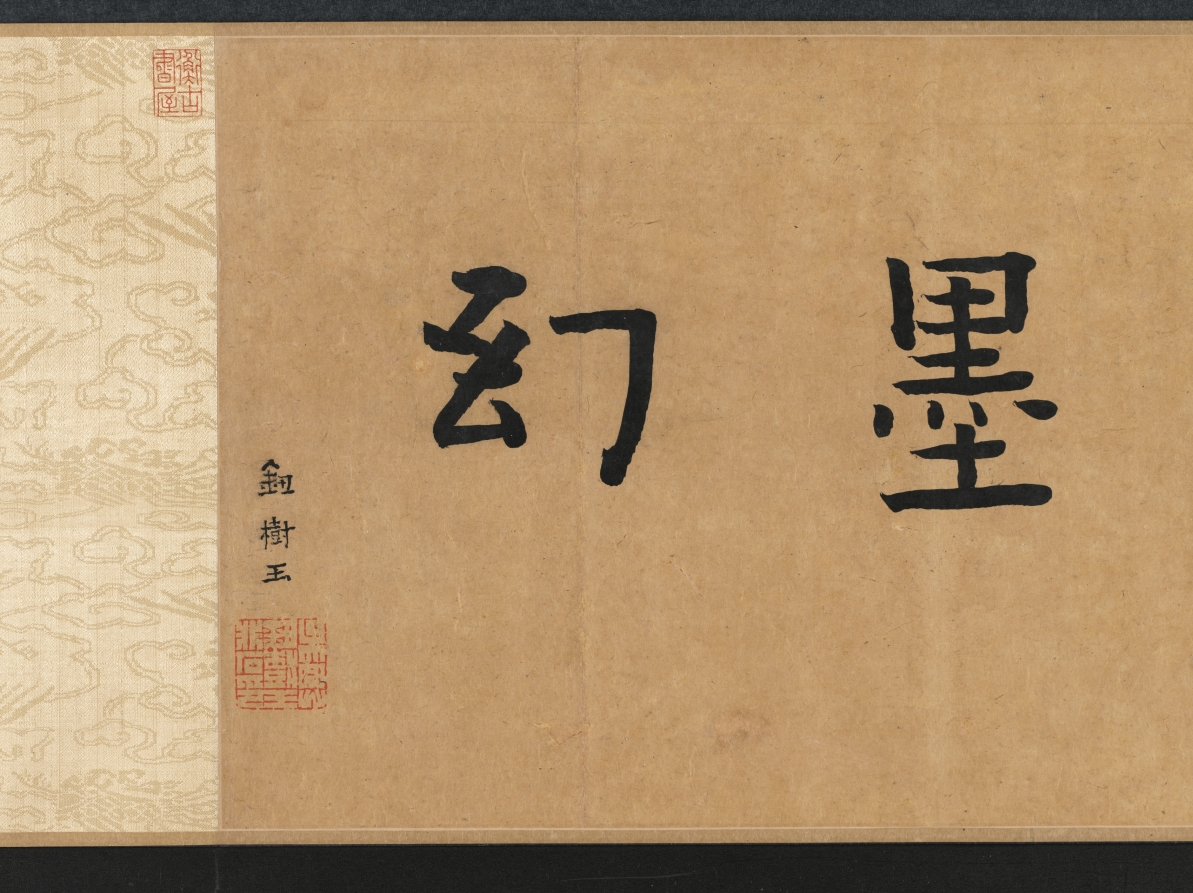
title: The Lantern Night Excursion of Zhong Kui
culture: China, Yuan dynasty (1271-1368)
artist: Yan Hui (Chinese, active 1270–1310)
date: late 1200s–early 1300s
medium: handscroll; ink and slight color on silk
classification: Painting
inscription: Artist's signature [and probable seal]: Yan Qiuyue 顏秋月 Title on frontispiece and 1 seal of Niu Shuyu 鈕樹玉 (1760–1827): Qiuyue mohuan 秋月墨幻 [Qiuyue's Ink Fantasy]. 31 additional seals: 2 of Yang Shiqi 楊士奇 (1365–1444); 2 of An Guo 安國 (1481–1534); 8 of Xiang Yuanbian 項元汴 (1525–1590); 2 of Geng Zhaozhong 耿昭忠 (1640–1686); 4 of Pu Tung 溥侗 (1870–1952); 7 of Tan Jing 譚敬 (1911–1991); 1 of Liu Ting-chih (20th c.); 5 unidentified.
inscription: An inscription by Zizhi Shanren 紫芝山人 [probably Jiang Hui 蔣惠], dated 1389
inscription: An inscription by Wu Kuan 吳寬 (1436–1504)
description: Here, the demon queller Zhong Kui leads a nightly procession of street entertainers with bare, muscular bodies and demonic faces. Some wear shabby clothes, and all perform stunts and tricks to astound and scare the viewer. In fact, a New Year custom in cities of southeast China had the poor, disguised as demons, process through the streets and play their tricks to clear households of evil spirits and welcome the spring. From right to left, a demonic figure leads the procession and beats a drum; another lifts a large rock; one stands on his hands trying to drink; one balances a jar on his elbow; three hold and wield weapons; one carries a folded chair covered by a cow’s skin; another holds Zhong Kui’s qin (zither), books, brush, and inkstone. At the end of the scroll, two figures offer a cup and bottle of wine to Zhong Kui, who lifts his hand in command.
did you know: Zhong Kui was an ancient ghostbuster.